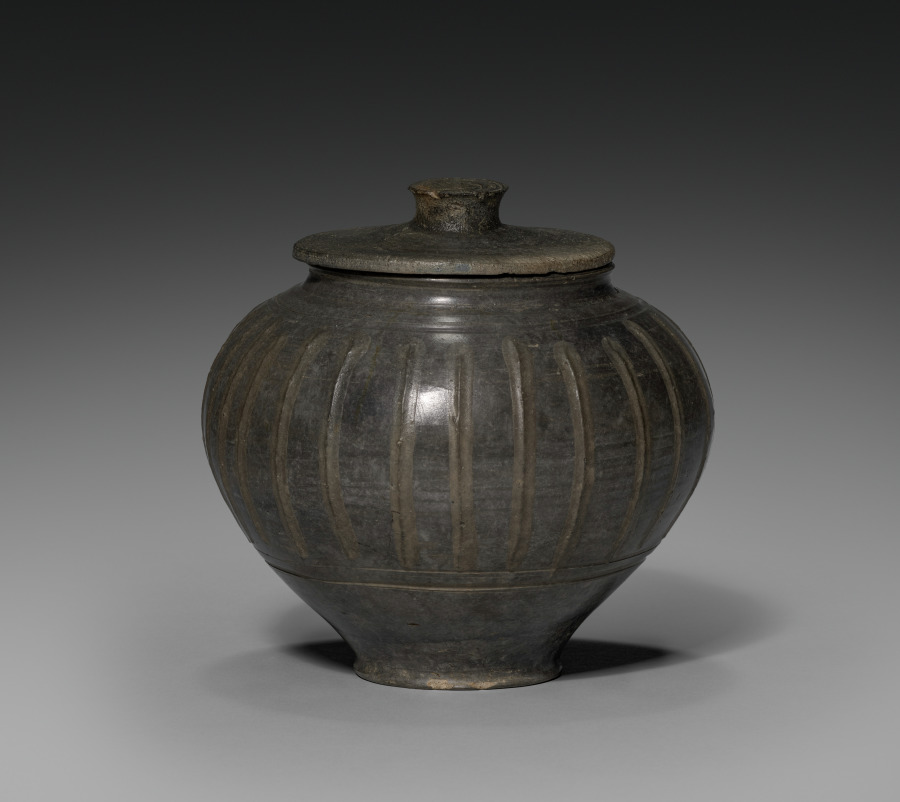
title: Pot with Cover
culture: Rhenish (Cologne), Gallo-Roman, 2nd century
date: 100–200 CE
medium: tan ware with gray and some brown burnished slip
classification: Ceramic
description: This elegant pot with its matching lid was made using a potter’s wheel, evident from the subtle horizontal rings that are visible across the belly of the vessel. The vertical ribs were added after the pot was removed from the wheel, using a thick clay paste. The vessel’s lid suggests that it was used for storage.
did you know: The shiny surface of this pot was made using a technique called burnishing, performed by polishing a surface with a hard, smooth object.